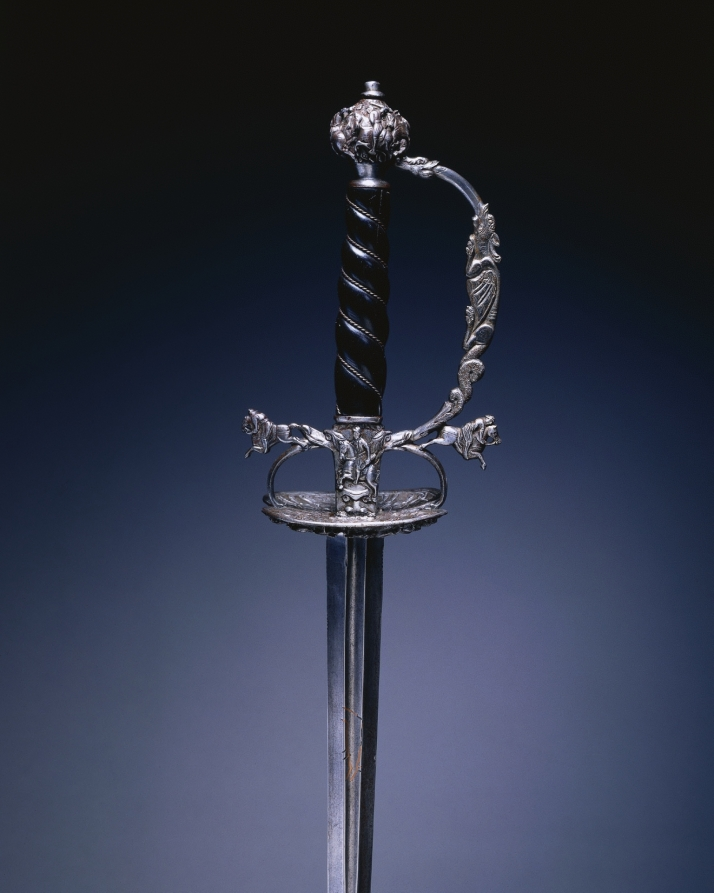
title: Small Sword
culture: Germany, Passau (?), 17th century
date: 1640–60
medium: steel, wood, steel wire, copper, chiseled shell guard; blade: blued, gilded, pierced and engraved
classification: Arms and Armor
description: During the 1700s, the small-sword emerged as a light, quick weapon. Like the rapier it was carried by unarmored civilians, the noblemen of the upper classes. Over time this delicate sword became more an accessory of male attire than a weapon essential to life and death. The sword hilt, which shows even when the blade is sheathed, became the ground for elaborate decoration. These small-swords thus represent the final stage in the evolution of the sword, from the edged weapons of antiquity to the elegantly refined blades of the 1700s and 1800s.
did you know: This small sword has a veritable panoply of animal imagery. Men ride horses across the crossguard, the horizontal element closest to the blade, and around the pommel, the globular tip of the handle. Mythical animals feature prominently on the guard, the semi-circular piece that covered the knuckles.